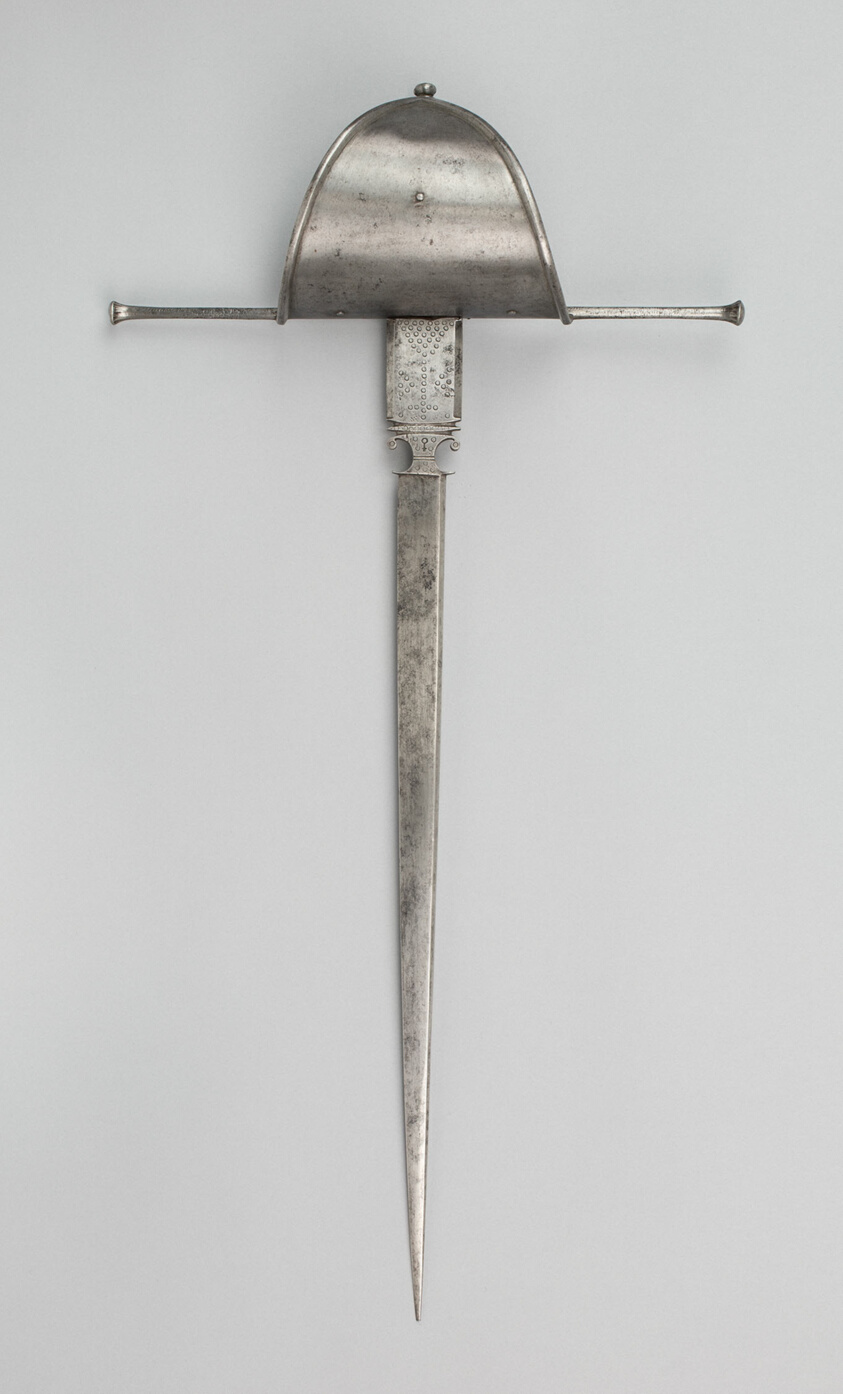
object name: Arms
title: Parrying Dagger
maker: Spanish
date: late 17th century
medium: Steel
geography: Spain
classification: edged weapon-dagger; arms; arms and armor